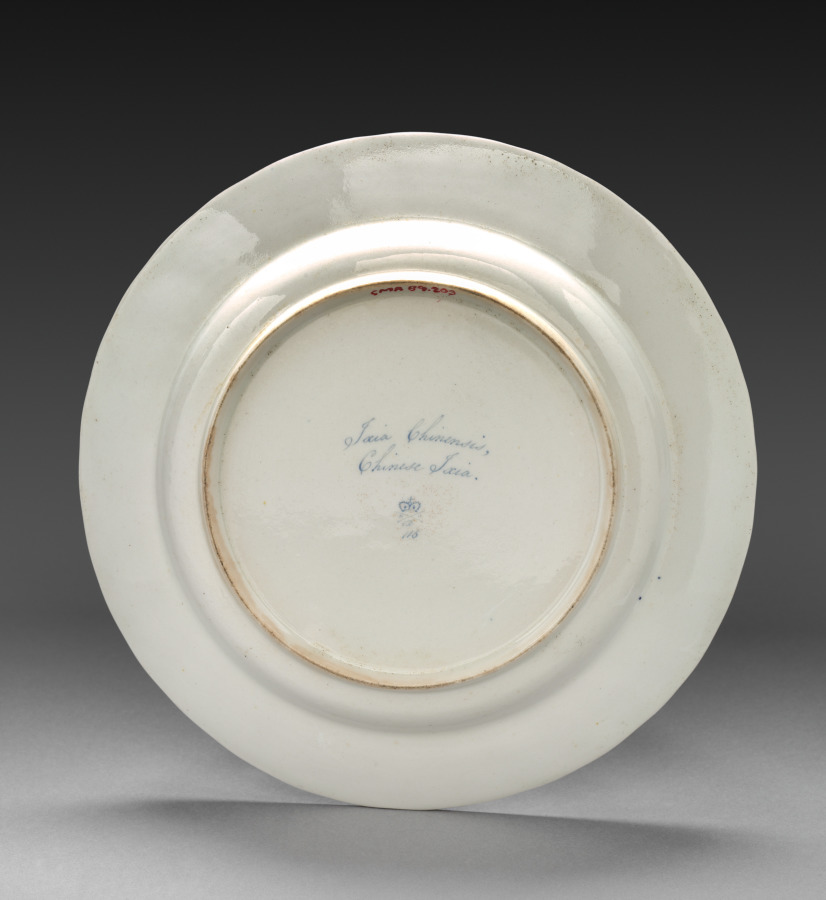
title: Plate from Dessert Service: Chinese Ixia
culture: England, Derby, 18th century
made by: Derby (Crown Derby Period) (British)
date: c. 1800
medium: porcelain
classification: Ceramic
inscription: inscribed in blue on back: Ixia Chinensis./Chinese Ixia./crown/crossed batons and dots/D/115.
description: Each dish is decorated with recognizable plants, the names of which are inscribed on the base in both Latin and English. Identifying the blossoms only became customary in the late 18th century when a single piece of porcelain was decorated with one species, and flowers were represented along with leaves, stems, seed pods, and roots. All of this reflects Carolus Linnaeus’s recent invention of a scientific method to categorize all known flora. The decorations on the Derby factory’s products derive from contemporary English botanical publications. For instance, illustrations in William Curtis’s The Botanical Magazine served as models for the French marigold and nettle leaved bell flower on the dessert service.